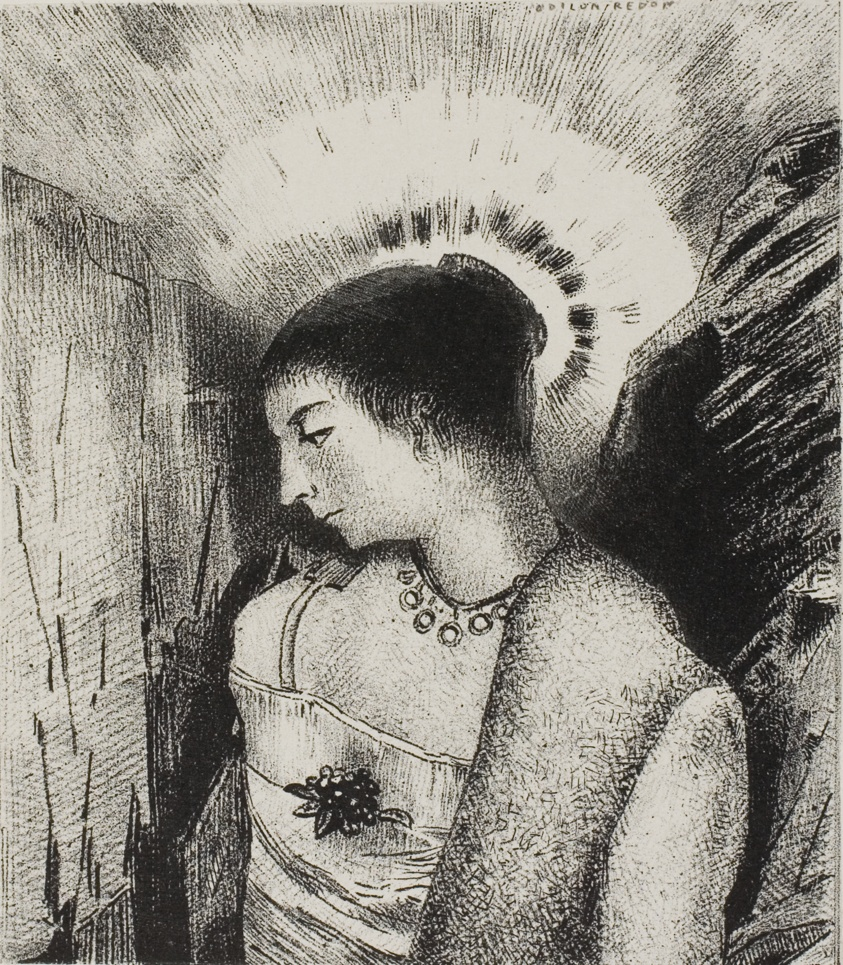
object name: Print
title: Here is the Good Goddess, the Idaean Mother of the Mountains, plate 15 of 24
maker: Odilon Redon (French, 1840-1916)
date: 1896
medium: Lithograph in black on ivory China paper laid down on ivory wove paper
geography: France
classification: lithograph; print; prints and drawing; paper